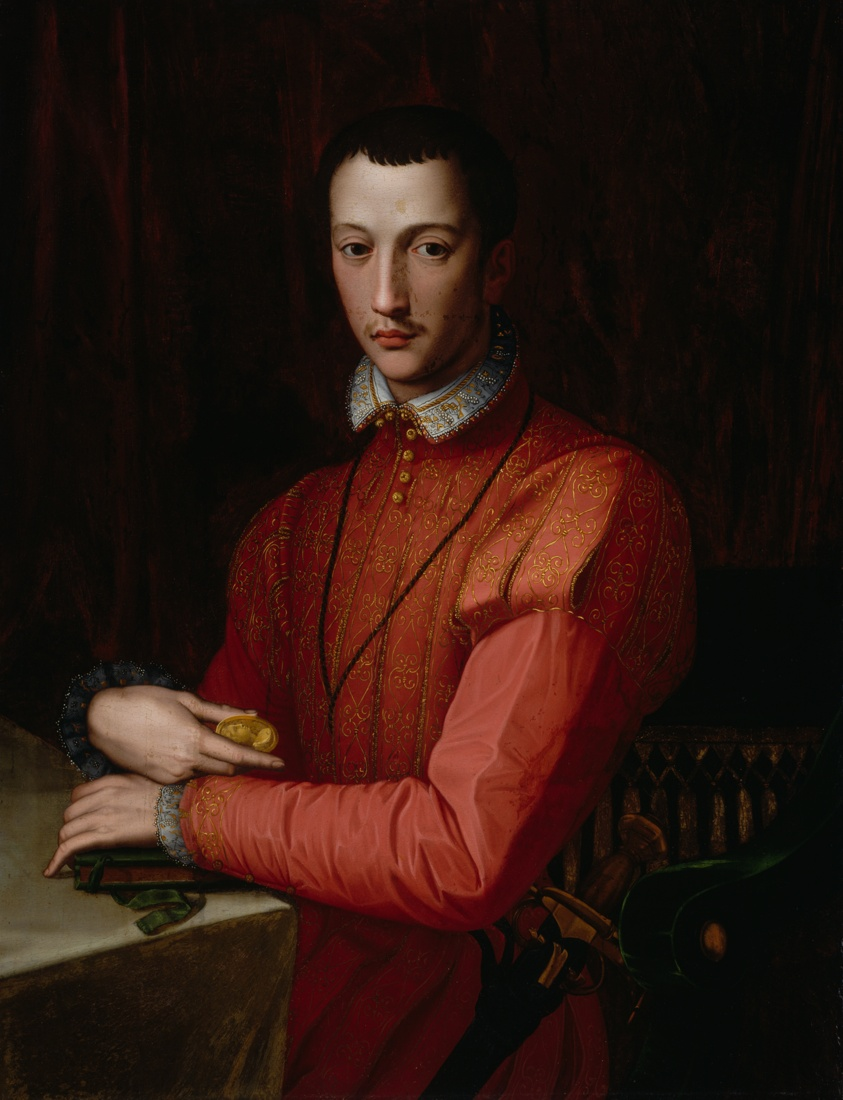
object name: Painting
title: Francesco de' Medici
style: 16th Century, Baroque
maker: Attributed to Alessandro Allori (Italian, 1535–1607)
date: c. 1560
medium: Oil on panel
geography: Italy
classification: painting; oil on panel; portrait; european painting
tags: portrait, man, portraits, portraits: male subject